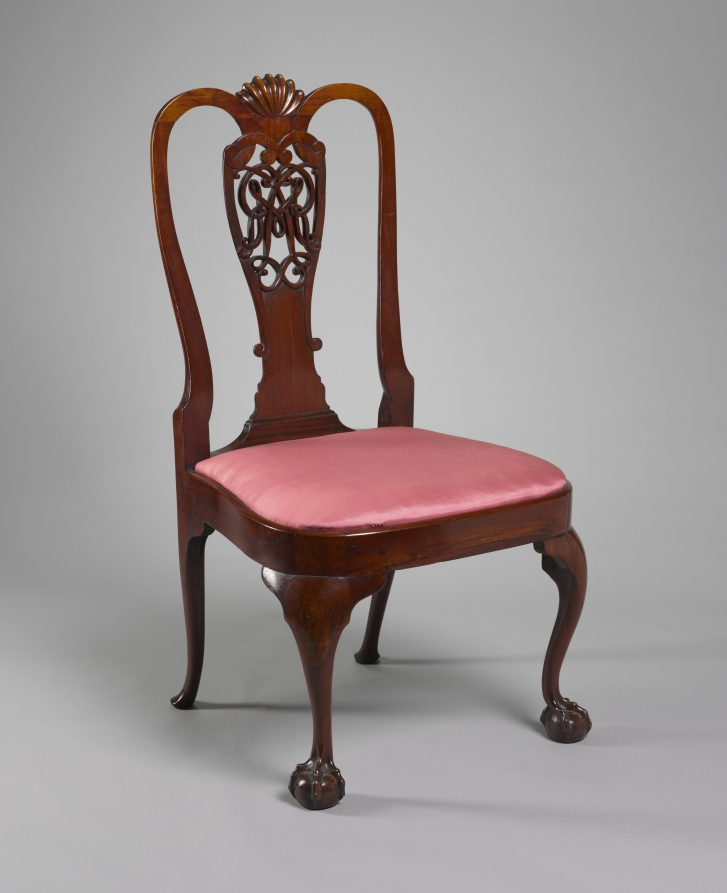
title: Side Chair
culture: America, New York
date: c. 1760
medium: mahogany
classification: Furniture and woodwork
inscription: pieced splat with initials of first owners: R M & L; seat cover with initials of second owner: C L G; Roman numeral VI incised on inner surface of rear seat rail.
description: Chairs with their splats pierced with a decorative monogram are rare in eighteenth-century English furniture, and this chair is part of a unique American set. The initials "R.M.L." are those of Robert (1718–1775) and Margaret Beekman (1724–1800) Livingston of Clemont, a house on the Hudson River north of New York City.